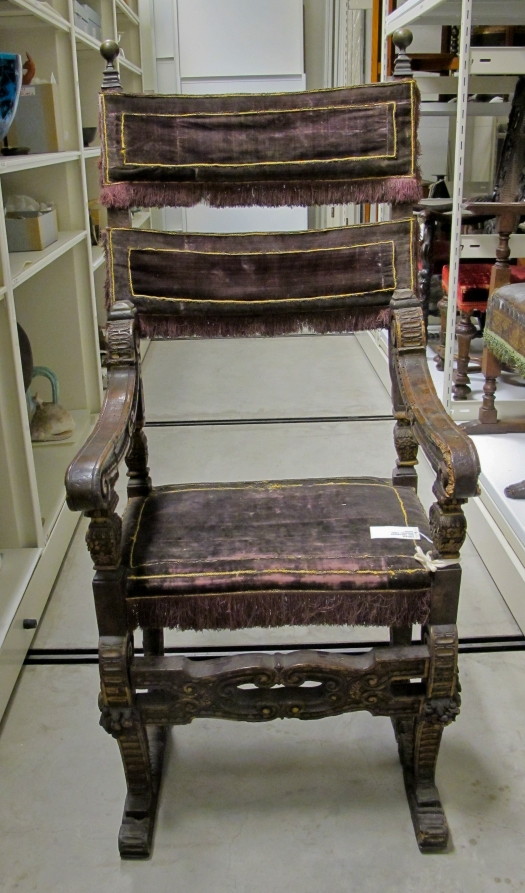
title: Armchair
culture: Italy, 16th century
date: 1500s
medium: walnut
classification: Furniture and woodwork